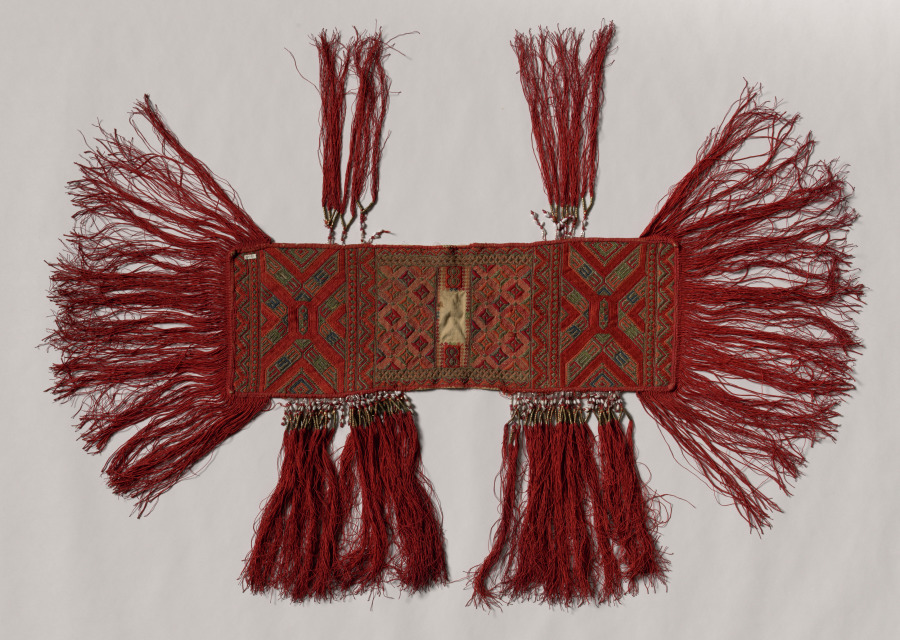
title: Garment or accessory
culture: probably southeastern Europe, Balkans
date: 1800s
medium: Silk, metal, dye, shells, glass, linen?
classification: Embroidery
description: This textile is densely covered with silk and metal thread embroidery, shells, and glass and metal beads. It has thick red fringes added on all sides. Its substrate (base layer) might be made from linen.